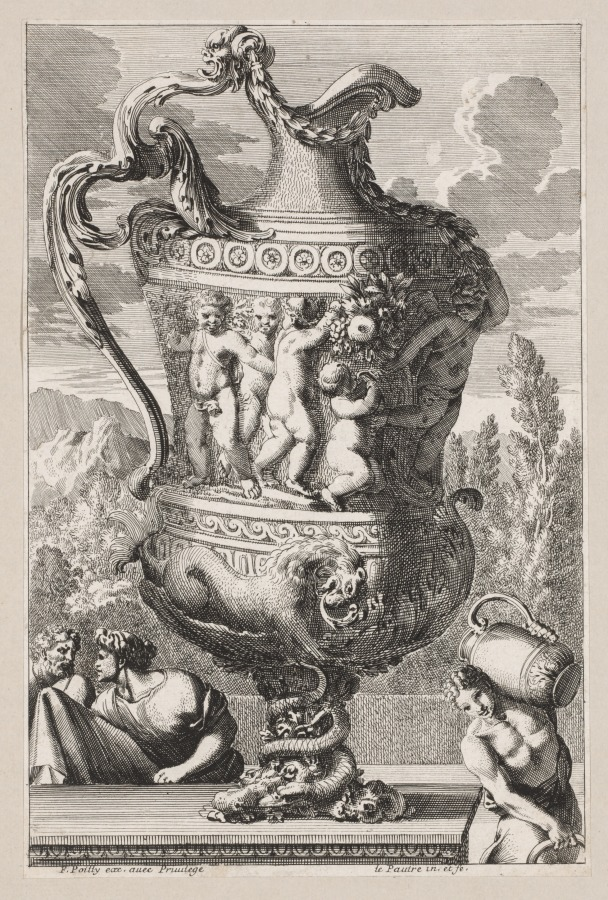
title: Decorative Urn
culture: France, 17th century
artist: Jean Le Pautre (French, 1618–1682)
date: 1600s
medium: etching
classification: Print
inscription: inscribed, lower left, in plate: F. Poilly exc. avec Privilege; inscribed, lower right, in plate: le Pautre in. et fe.